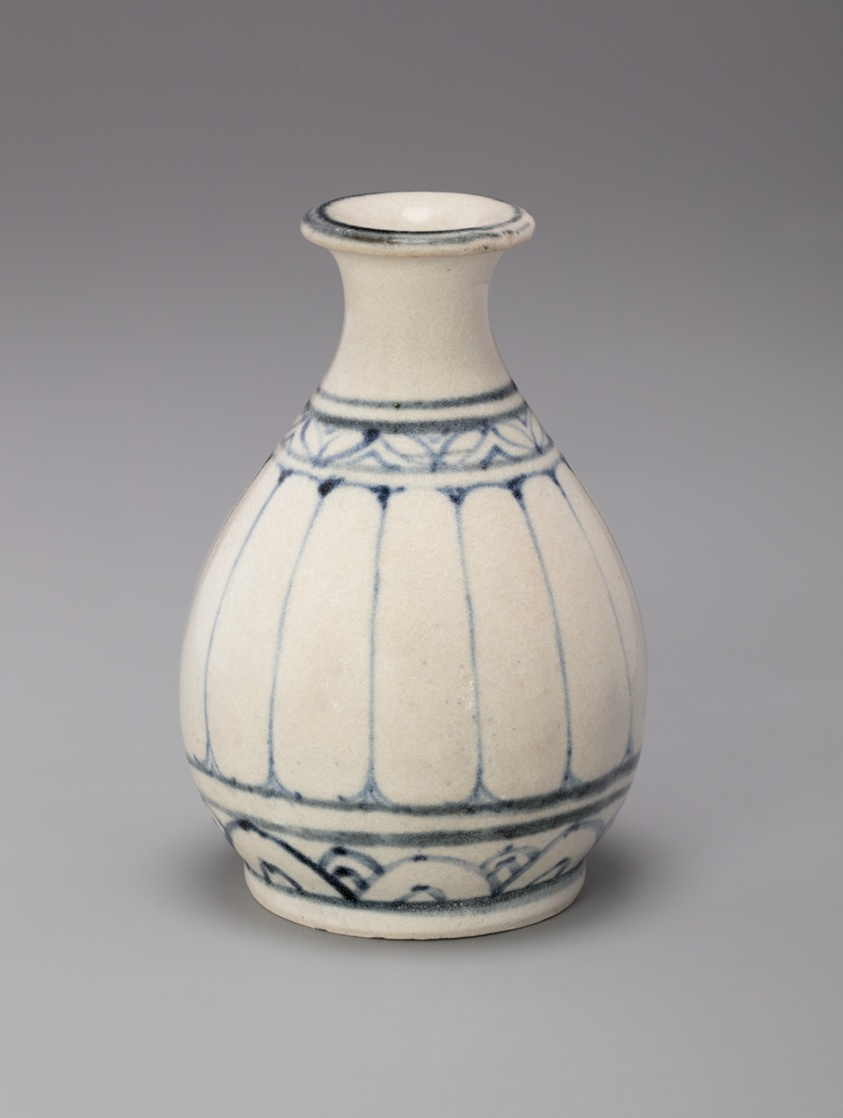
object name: Ceramics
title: Miniature Pear-Shaped (Yuhuchun) Bottle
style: Southeast Asian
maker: Vietnam; near Hoi An (offshore)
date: Late 15th/early 16th century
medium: Glazed stonware with cobalt-blue underglaze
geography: Vietnam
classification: ceramics; bottle; stoneware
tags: drinking, blue (color)